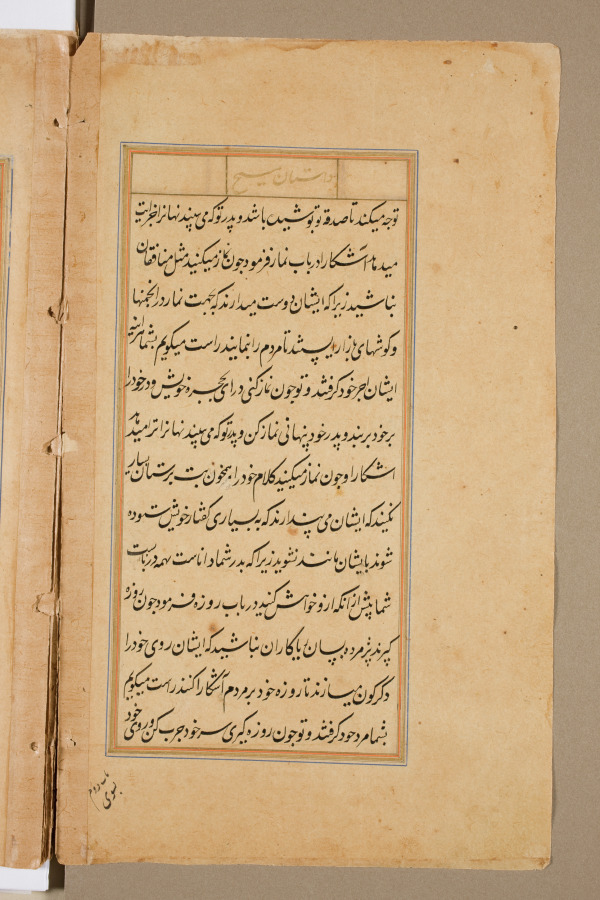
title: Text page from a Mirror of Holiness (Mir’at al-quds) of Father Jerome Xavier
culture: Mughal India, Allahabad, made for Prince Salim (1569–1627)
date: 1602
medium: Ink and gold on paper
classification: Manuscript